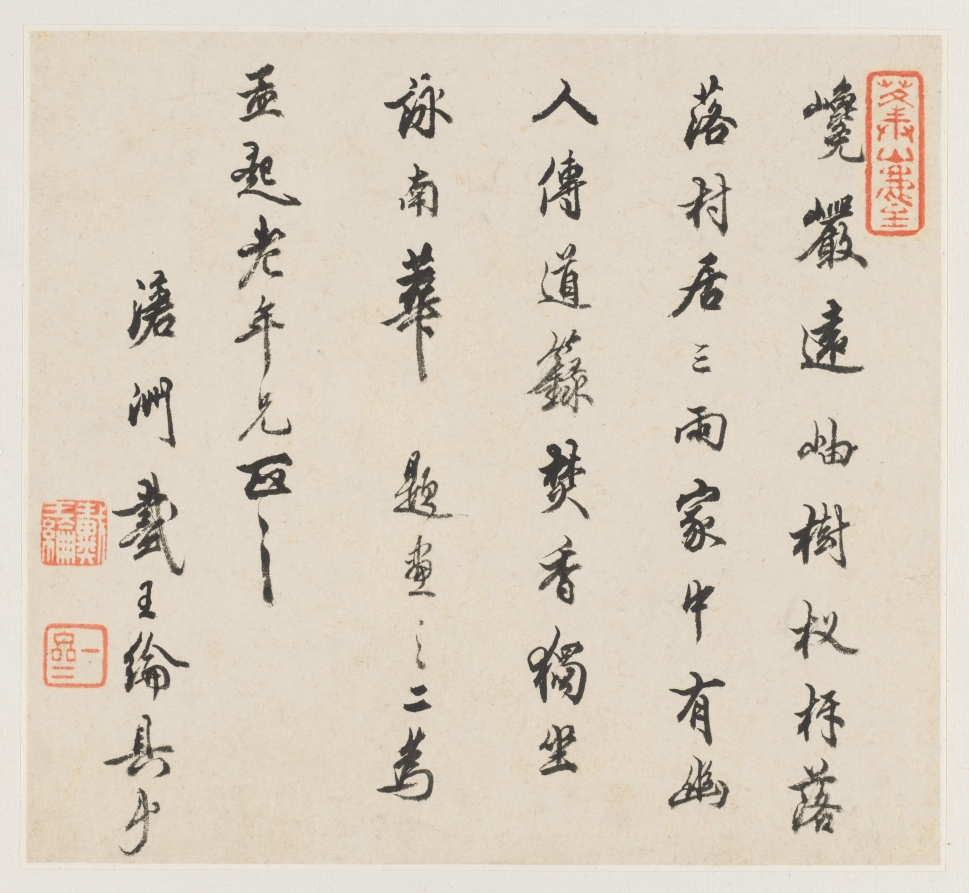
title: Album of Landscapes: Leaf 7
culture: China, Qing dynasty (1644-1911)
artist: Wang Gai (Chinese, active c. 1677–1705)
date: 1677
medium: album leaf, ink and light color on paper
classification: Painting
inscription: Artist's poem, signature and seal on leaf 7 Poem by Tai Wang-lun